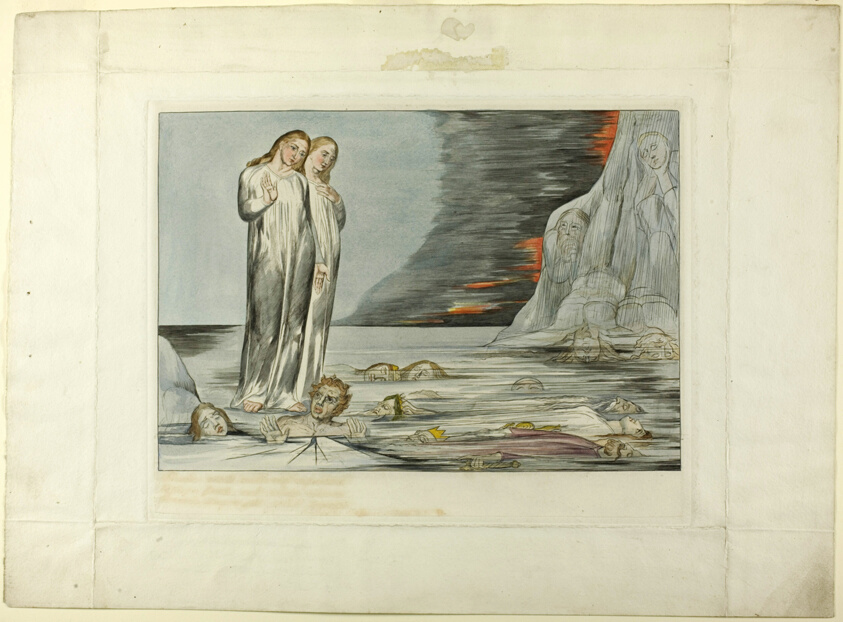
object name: Print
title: The Circle of the Traitors; Dante's Foot Striking Bocca degli Abbate. Inferno, canto XXXII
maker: William Blake (English, 1757-1827)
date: 1827, printed c. 1892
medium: Hand-colored engraving on India paper, laid down on wove paper (chine collé)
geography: England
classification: engraving; paper; print; prints and drawing